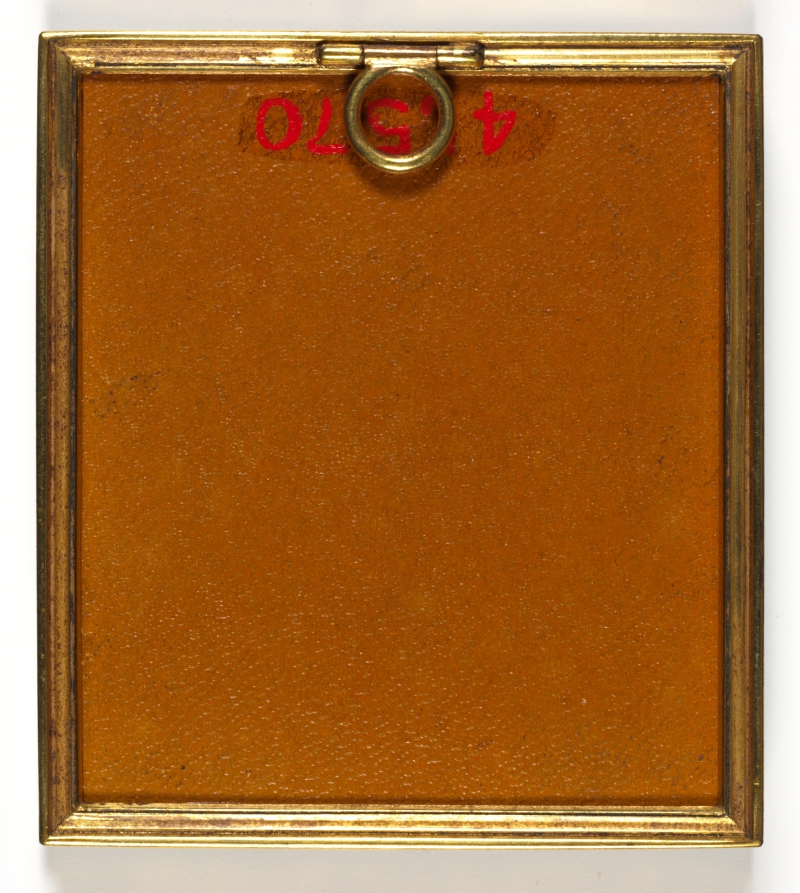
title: Portrait of M. de Viapre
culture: England, 18th century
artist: John I Smart (British, 1741–1811)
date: c. 1776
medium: graphite and wash on laid paper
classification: Portrait Miniature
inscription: Signature: none; inscribed on paper backing in graphite, upside down at upper left: 196; also on paper backing on slant at center, in graphite: Sir ?/John/Lester and 11; inscribed on back of drawing, under paper backing in graphite at bottom: Mr De [G?]iaf . . .; and in brown ink from top to bottom: Scarlet Coat . . . der Bottom [or possibly button]. . . green waistcoat . . . racelet & Spring [deli]vrd to Mr. Hall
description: Although it is impossible to say if it was always part of the artist’s process to execute a preparatory sketch prior to painting each miniature, we do know that John Smart retained many hundreds of these sketches. A group of preparatory sketches—of which this portrait is one—descended through the Smirke family after Smart’s daughter Sarah gave a sketchbook containing preparatory portrait studies to her friend Mary Smirke, sister of the celebrated Victorian architect Sydney Smirke. This book was probably broken up around 1877 when it was divided between Sydney’s daughters Mary Jemmett and Mrs. Lange, whose portions were both sold at auction in 1928. G. C. Williamson was the first to suggest that Smart’s sketches were well known and that they were preparatory studies for the painted miniatures. Williamson listed the names of sitters from the sketches known to him at the time, and they include Sir John Lester, the title formerly given to the sketch here. This designation was applied only to a paper backing that had been attached after the drawing had been removed from the sketchbook. There is no further evidence for this attribution, however. This sketch presents only the sitter’s head, with a slight suggestion of a high stock collar. His head faces to the left, and his light hair is combed straight back with a flat curl above the right ear. He has gray eyes, and the background is unpainted. The work can be dated to around 1776 because of its size, which, when painted on ivory, would have been around 2 inches high. An inscription on the back of the drawing was discovered when the paper backing was removed in 1993. It is a fragment of a larger inscription, from which it has been cut. It is partly illegible but suggests that the work was intended to be set in a bracelet, and it gives some information about how the sitter was to appear in the finished miniature, including the description “scarlet coat . . . green waistcoat.” This combination of colors might seem almost flashy, but it appears elsewhere in Smart’s work. These details seem to have been written in Smart’s hand, while the graphite inscription below—“Mr. De [?]”—was probably written later in another hand. Miniatures expert Arthur Jaffé remarked in 1948 that this portrait probably depicted John Lester of Poole, Dorset, who was knighted in 1802. However, this identity was based solely on the inscription on the later paper backing that Jaffé did not have the opportunity to see removed to reveal the inscription in Smart’s hand on the back of the drawing itself. There are no portraits of Sir John Lester known, and to this date, the finished ivory for which this preparatory sketch was presumably undertaken has not been discovered.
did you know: Sketches helped John Smart work out the particulars of a portrait before commencing the miniature on ivory; they were useful in the event that a duplicate might later be required.